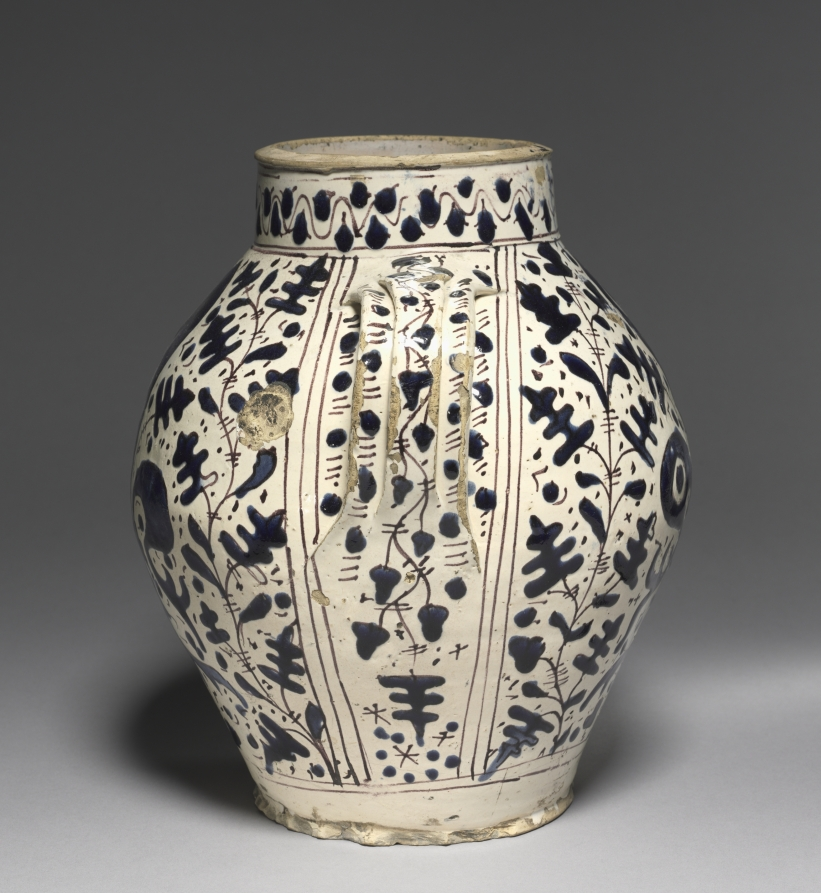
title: Two-Handled "Oak Leaf" Pharmacy Jar with Fleur-de-Lys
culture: Italy, Florence, 15th century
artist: workshop of Giunta di Tugio (Italian, c. 1382–1450)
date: c. 1430–1450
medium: tin-glazed earthenware (maiolica)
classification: Ceramic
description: Giunta di Tugio was the most important maiolica ceramist of his time in Florence. Di Tugio was trained in his father's workshop, which he took over following his father's death around 1419, managing it for the next thirty years. According to documents, by 1417 di Tugio was a member of the council of oliandoli, or oil merchants.